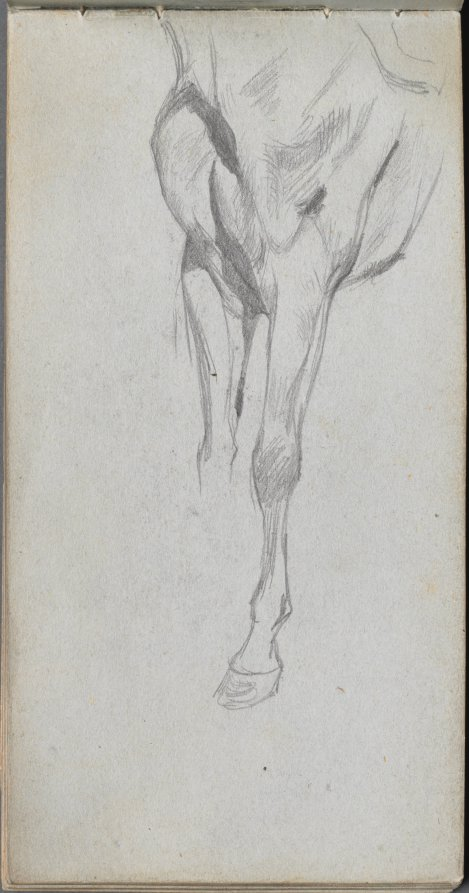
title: Sketchbook, page 48: Study of A Horse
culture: France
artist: Ernest Meissonier (French, 1815–1891)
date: c. 1860s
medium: graphite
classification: Bound Volume